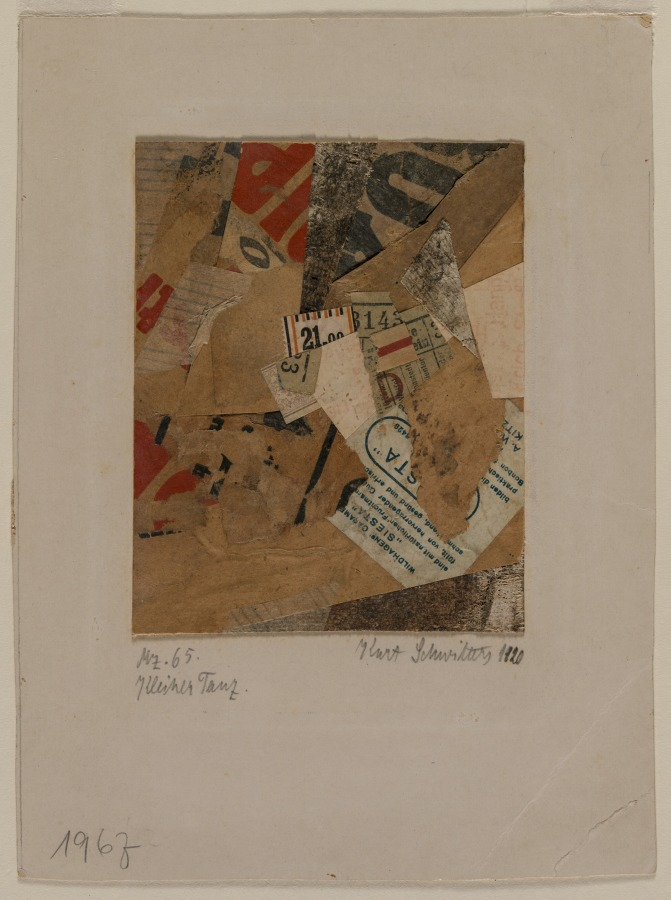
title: Little Dance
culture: Germany, 20th century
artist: Kurt Schwitters (German, 1887–1948)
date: 1920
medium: collage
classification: Drawing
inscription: SECONDARY SUPPORT, signed, lower right, in graphite: Kurt Schwitters 1920 ; by artist, lower left, in graphite: Mz. 65. / Kleiner Tanz. ; lower left, in graphite: 1967 ; VERSO OF SECONDARY SUPPORT, by artist, in top half: Kurt Schwitters / Hannover / [Waldmansustr?] 5II [II in superscript] ; upper left, in graphite: VI [underlined] 3 ; across center, in graphite: H__34201/VdMERZ/ ; upper right, in graphite: [paritally erased, illegible] ; lower right, in graphite: [partially erased, illegible] / [partially erased, illegible] ; lower right, in graphite: OUTSIDE O[N] / BACK / Janis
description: With collages of densely interwoven scraps of paper gleaned from daily life, Schwitters produced dynamic compositions in which the interaction of the materials becomes a kind of dance. Notice here the way the color red "dances" among the subdued tones of white, gray, and ochre.